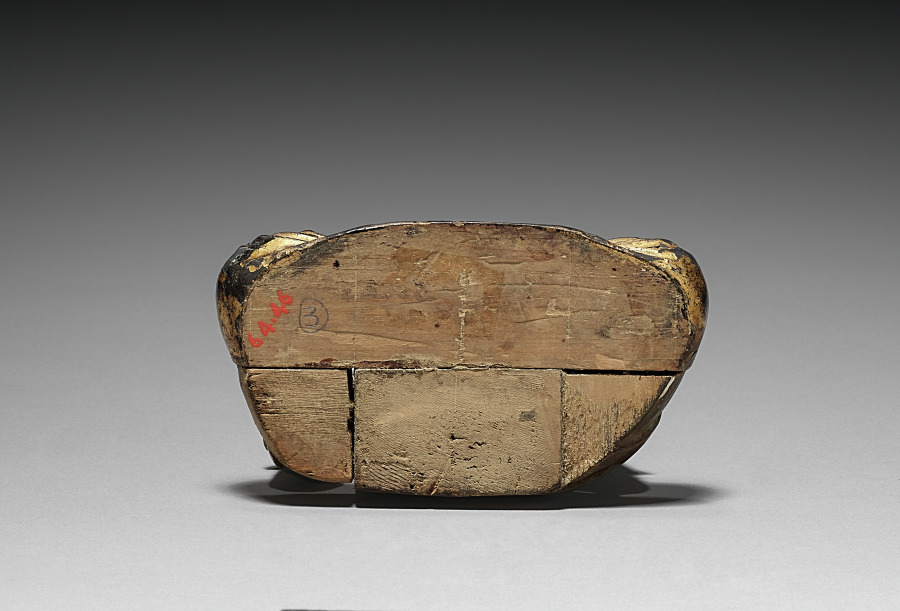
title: Bodhisattva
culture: Japan, Heian period (794–1185)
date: 900s-1100s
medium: gilded wood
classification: Sculpture